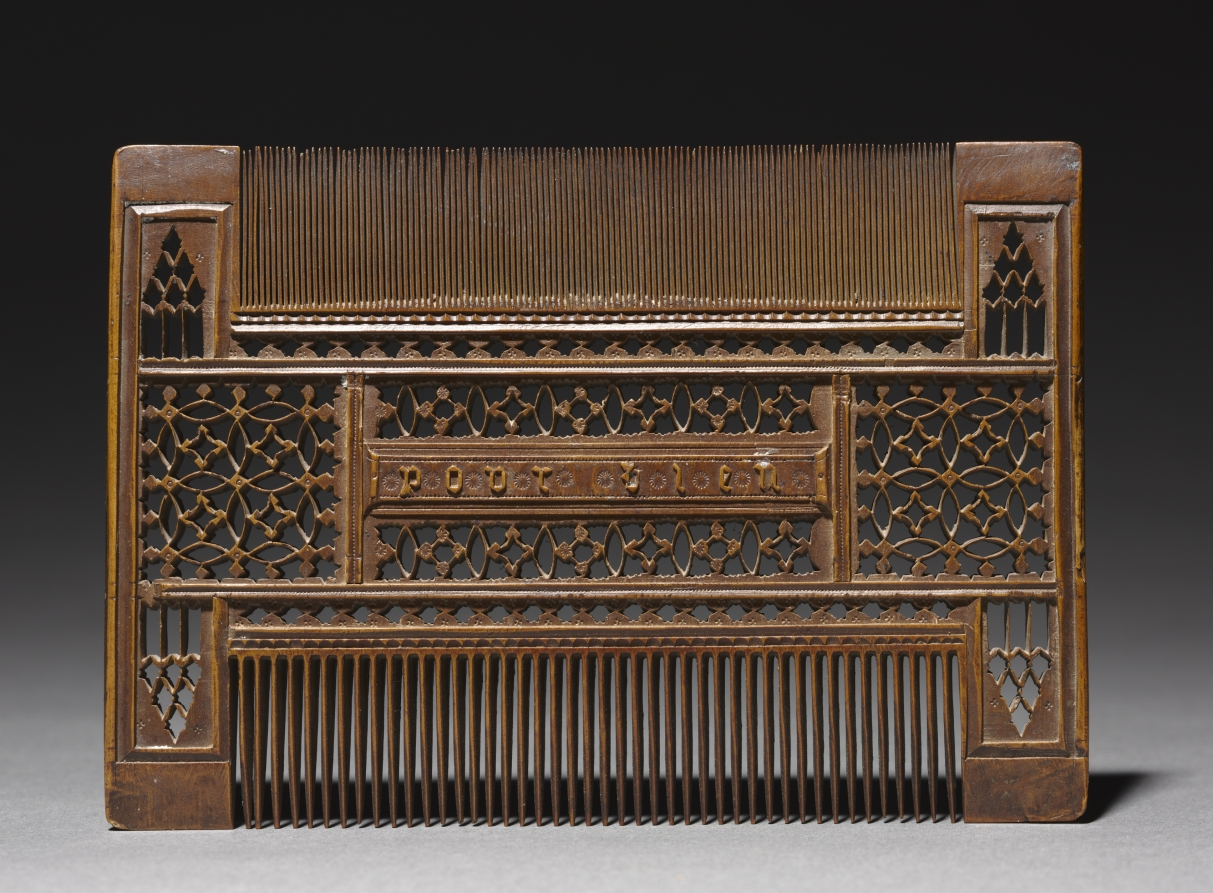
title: Comb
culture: France, Gothic period, 15th century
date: 1400s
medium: boxwood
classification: Jewelry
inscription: mon ♥️ aves pour bien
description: This luxury object is masterfully fashioned from a single piece of wood. The openwork carving is intended to resemble Gothic windows. The inscription reads, "mon ♥️ aves" on one side and "pour bien" on the other, translated to "you have my heart in your possession."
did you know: Boxwood is a light-colored wood which is very hard, close-grained, and fine-textured, allowing the carver to do very fine delicate work.